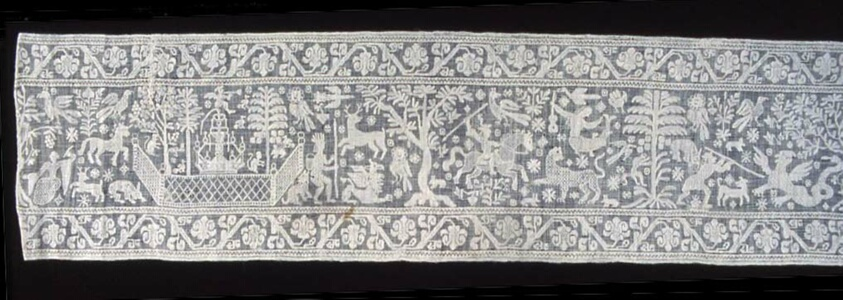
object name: Textile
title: Border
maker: Italy or Spain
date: 17th century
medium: Linen, plain gauze weave; embroidered with linen yarns in back, darning, double running; and overcast stitches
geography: Italy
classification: textile; needlework (visual works)